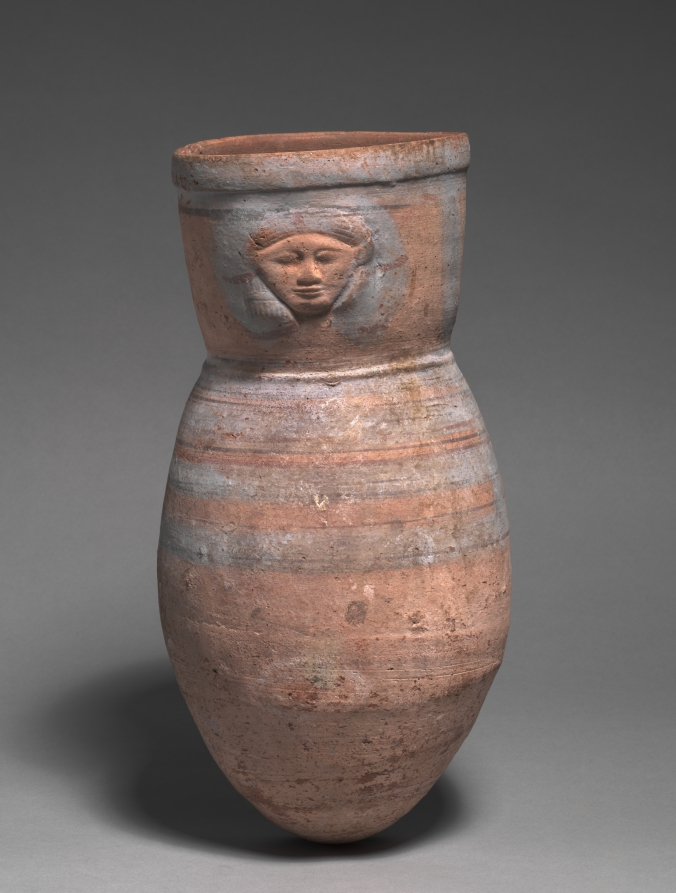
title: Hathor Jar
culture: Egypt, probably Malqata, New Kingdom (1540–1069 BCE), Dynasty 18, reign of Amenhotep III (1390–1352 BCE)–reign of Akhenaten (1351–1334 BCE)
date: 1391–1337 BCE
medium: Nile silt ware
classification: Vessels